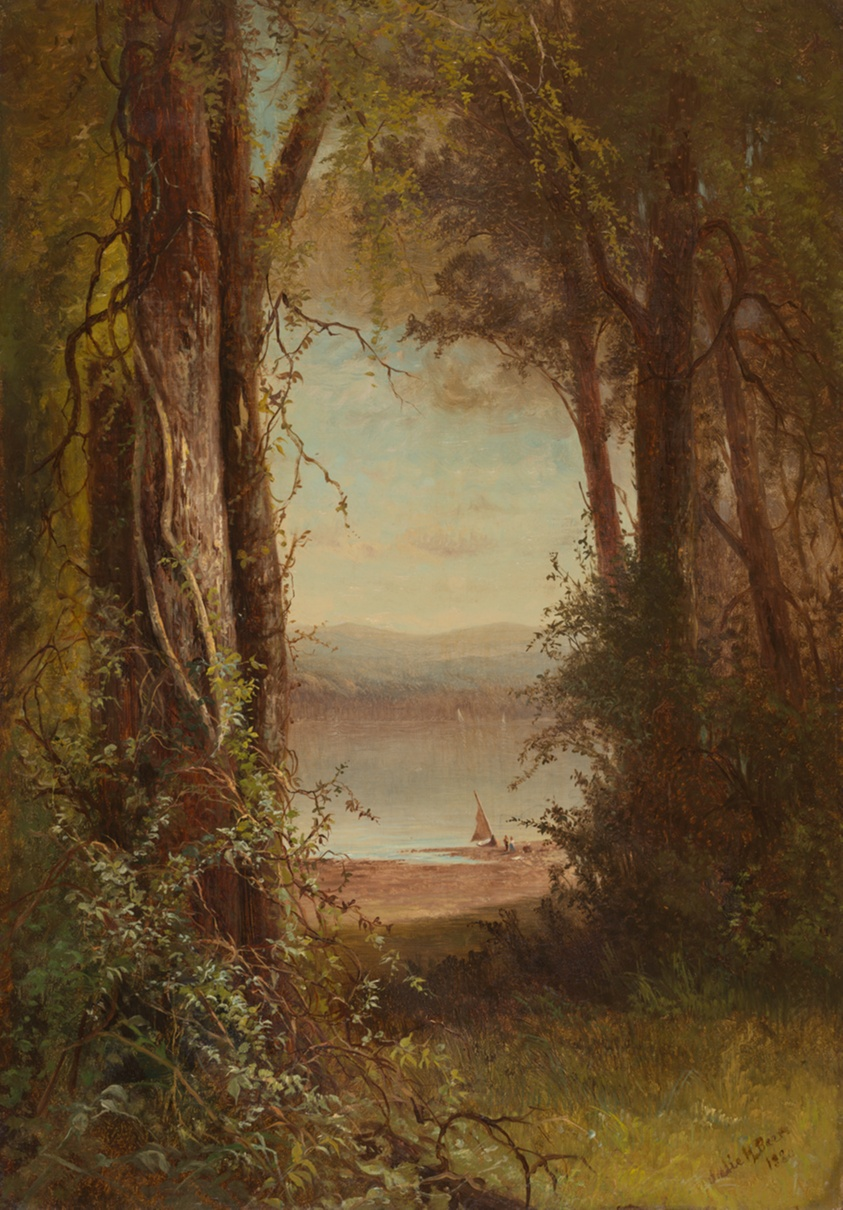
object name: Painting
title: Looking upon the River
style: Hudson River School, 19th century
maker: Julie Hart Beers (American, 1834–1913)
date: 1880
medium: Oil on canvas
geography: United States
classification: painting; american arts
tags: landscape, boats, forests, leisure, water